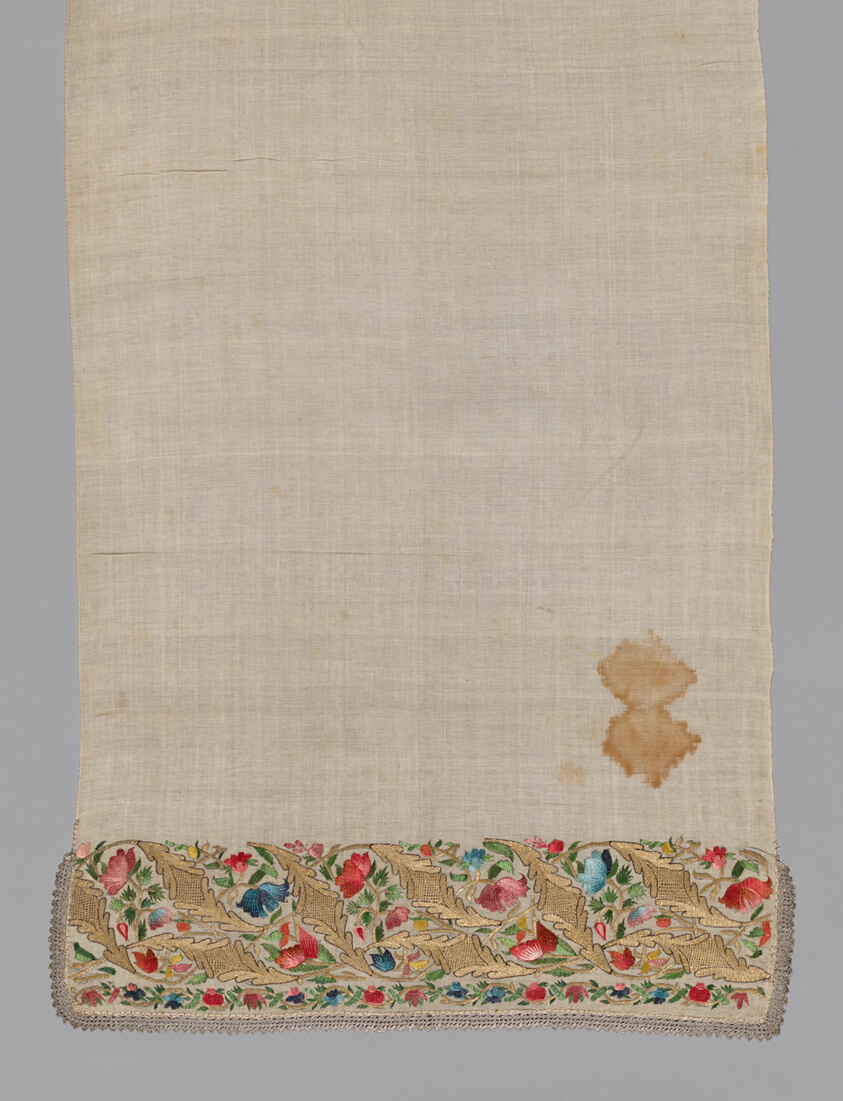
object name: Textile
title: Towel or Napkin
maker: Turkey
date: 19th century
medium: embroidered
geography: Turkey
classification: textile; needlework (visual works); weaving